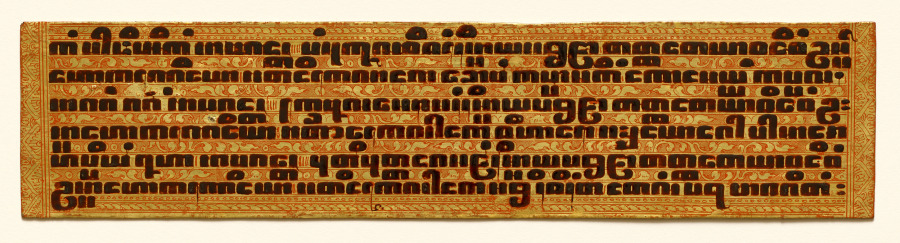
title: Text, folio 6 (recto) from a Kammavacha: Buddhist ordination text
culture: Myanmar (Burma)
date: 1800s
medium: Leaf: lacquer and gilding on cloth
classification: Manuscript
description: In premodern Burma, lay people commissioned lavishly ornamented manuscripts for ceremonial occasions, when officiants would read aloud from the text. Written in black lacquer, the text is in the language of Pali written in a Burmese script. It contains ordination rites and procedures for monastic ceremonies. The second to last page is covered with intricately drawn, winged celestial beings (nats) in gestures of praise. They fly amid intertwining vegetation—denoting bounty—that grows from serpentine forms that refer to rain clouds. Lionlike forms inhabit the space with them. The top and bottom covers are equally ornamented with jeweled floral patterning.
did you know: The Pali text of this manuscript is written in Burmese square script, which is also known as "tamarind seed script."